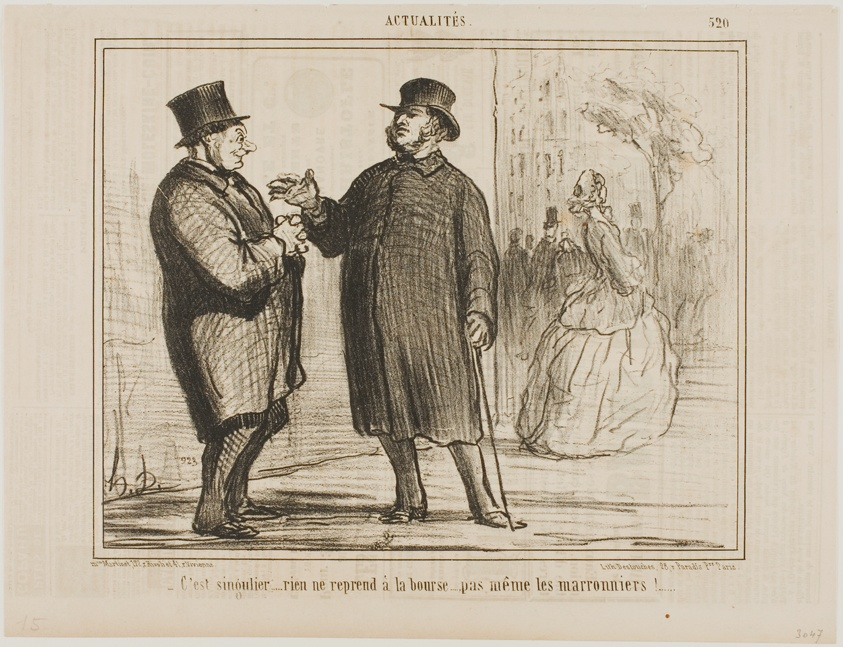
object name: Print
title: It’s strange: nothing is picking up at the stock exchange, not even the chestnut trees!, plate 520 from Actualités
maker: Honoré Victorin Daumier; French, 1808-1879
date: 1858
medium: Lithograph in black on white wove paper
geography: France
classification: lithograph; print; prints and drawing